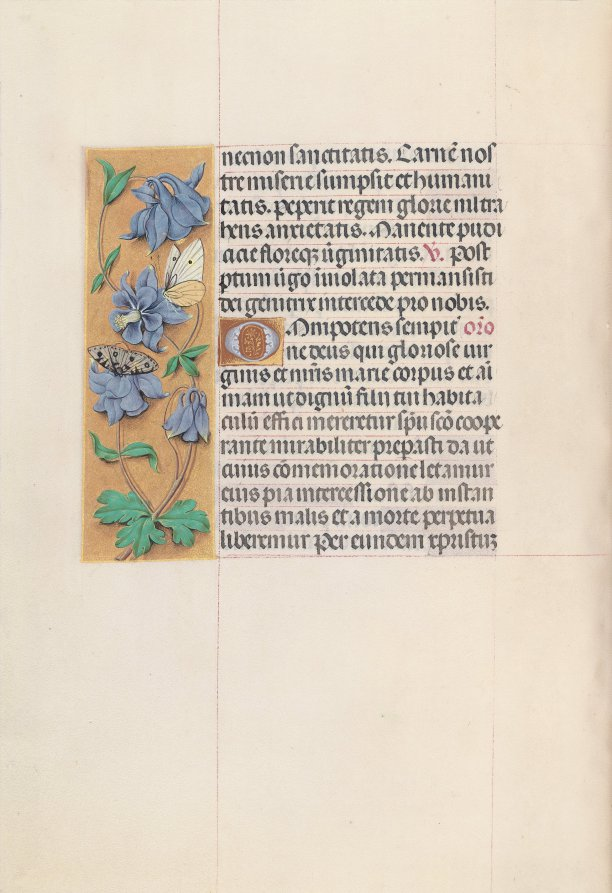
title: Hours of Queen Isabella the Catholic, Queen of Spain: Fol. 83v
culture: Flanders, Ghent and Bruges, late 15th century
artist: Master of the First Prayerbook of Maximillian (Flemish, c. 1444–1519)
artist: and Associates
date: c. 1500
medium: ink, tempera, and gold on vellum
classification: Bound Volume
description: This manuscript was illuminated by a circle of at least five highly organized manuscript painters active in the Flemish cities of Ghent and Bruges. The principal illuminator was Alexander Bening, who painted the majority of the book's miniatures. Manuscripts produced by this circle of artists are renowned for the decoration of their borders, which typically feature a rich variety of realistically-painted flowers, birds, and butterflies. This prayer book, called a book of hours, was intended not for a cleric, but for the private devotions of a lay person-in this case, Isabella the Catholic, Queen of Spain (1451-1504). Isabella's coat of arms embellishes the book's frontispiece. It is unlikely that the book was commissioned by the Queen herself; rather, she probably received it as a diplomatic gift from someone courting her patronage, perhaps Cardinal Francisco Jimenez de Cisneros. A Franciscan friar, Jimenez was dependent upon Isabella for his advancement, first to the post of Queen's confessor in 1492, and then to Archbishop of Toledo in 1495.